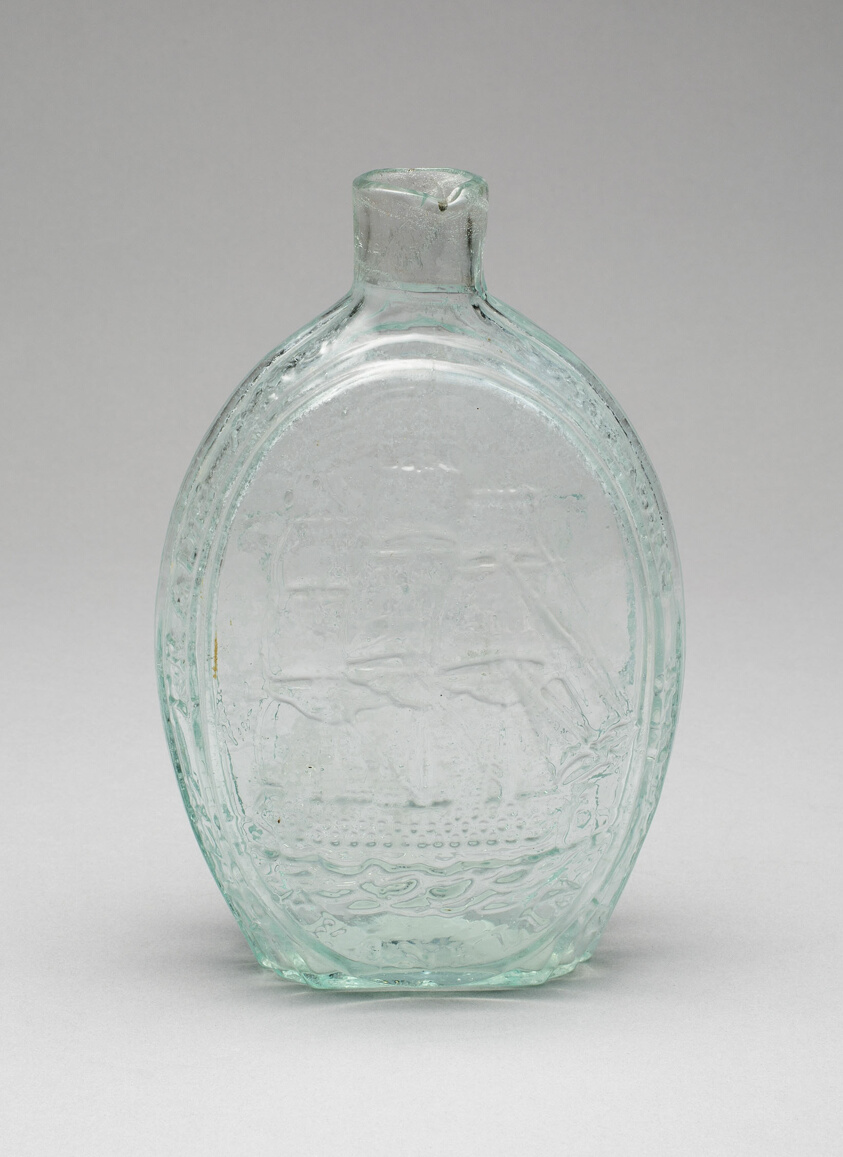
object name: Glass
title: Flask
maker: Kensington Glass Works (1773–1833); Philadelphia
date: 1822–40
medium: Glass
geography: Philadelphia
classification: flask (bottle); glass; american decorative arts; american arts; decorative arts